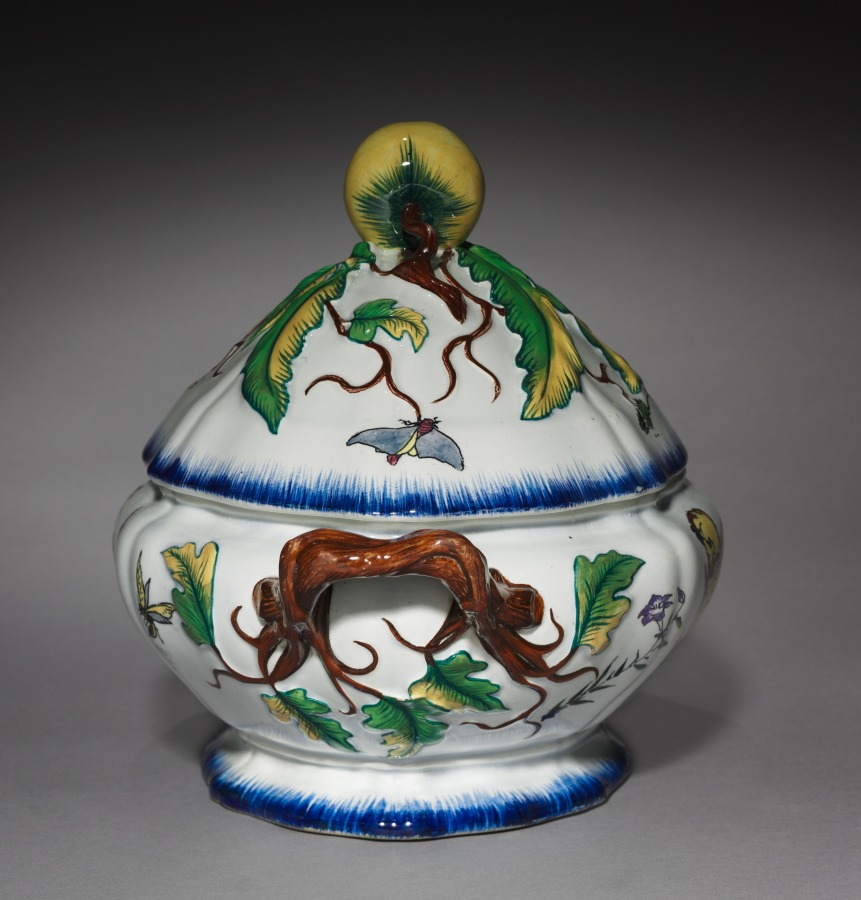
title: Covered Tureen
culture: France, Creil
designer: Félix Bracquemond (French, 1833–1914)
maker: Creil Factory (French)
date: 1866–75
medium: porcelain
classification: Ceramic